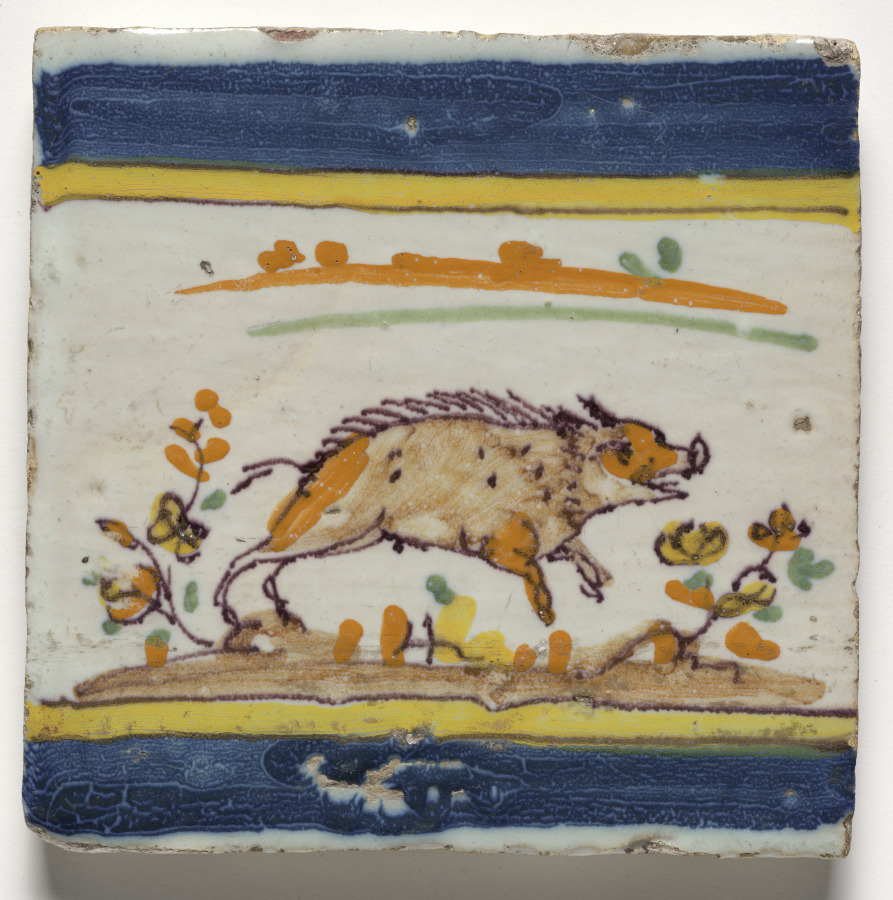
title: Wall Tile–Wild Boar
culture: Spain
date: c. 1600s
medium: glazed ceramic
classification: Ceramic